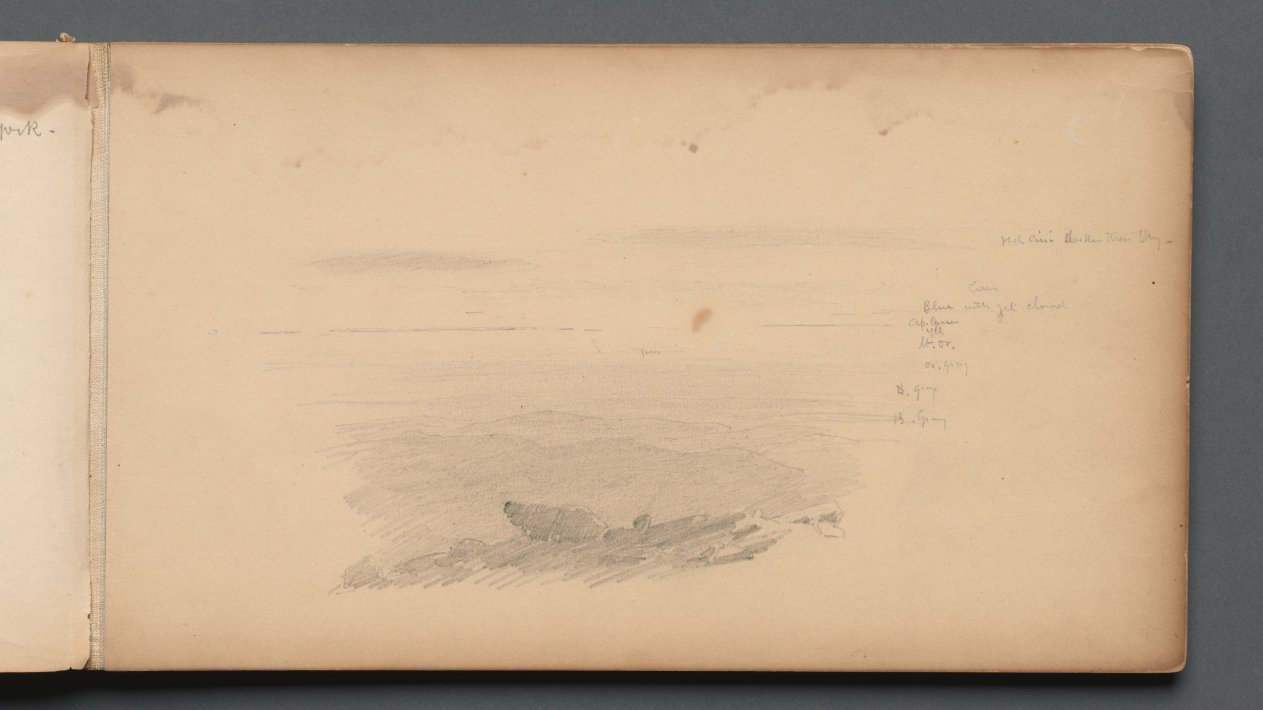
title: Sketchbook, page 04: Sea Scape with Color Notations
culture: America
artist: Sanford Robinson Gifford (American, 1823–1880)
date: 1859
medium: graphite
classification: Bound Volume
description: Gifford was an American landscape painter belonging to the second generation of Hudson River school artists. Based in New York City with a studio at the Tenth Street Studio Building, Gifford took annual summer trips to the Catskills, the Adirondacks, and other scenic locations in New England. This sketchbook accompanied the artist on his expedition in 1859 to New Hampshire and Maine, where he drew sites such as Dixville Notch, the White Mountains, and Peaks Island, Casco Bay. Gifford used such graphite studies as the basis for oil paintings worked up in his studio, such as A Home in the Wilderness (1866).